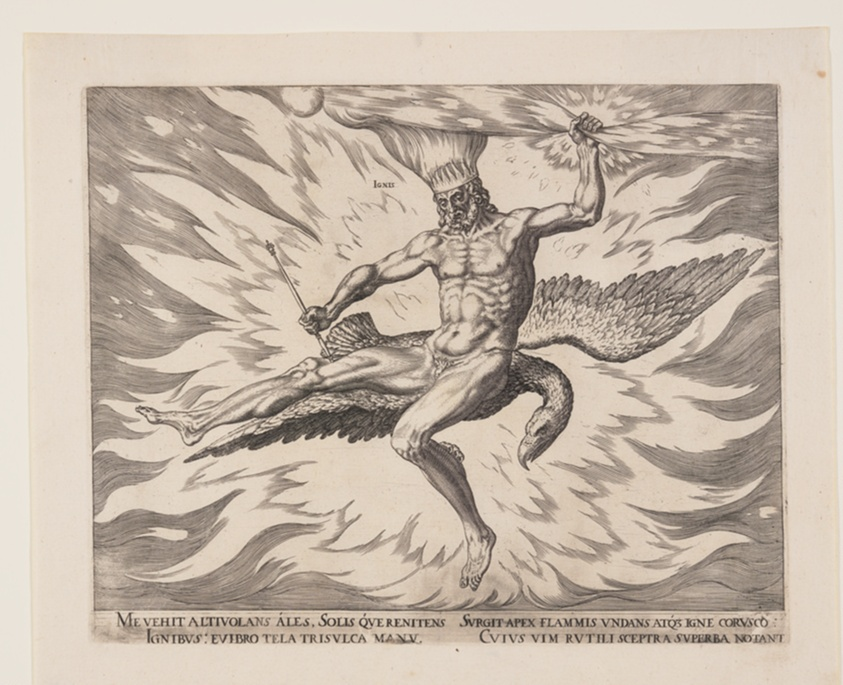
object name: Print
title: Fire, from The Four Elements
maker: Philip Galle; Flemish, 1537–1612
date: 1564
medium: Engraving on ivory laid paper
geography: Flanders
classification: engraving; paper; print; prints and drawing